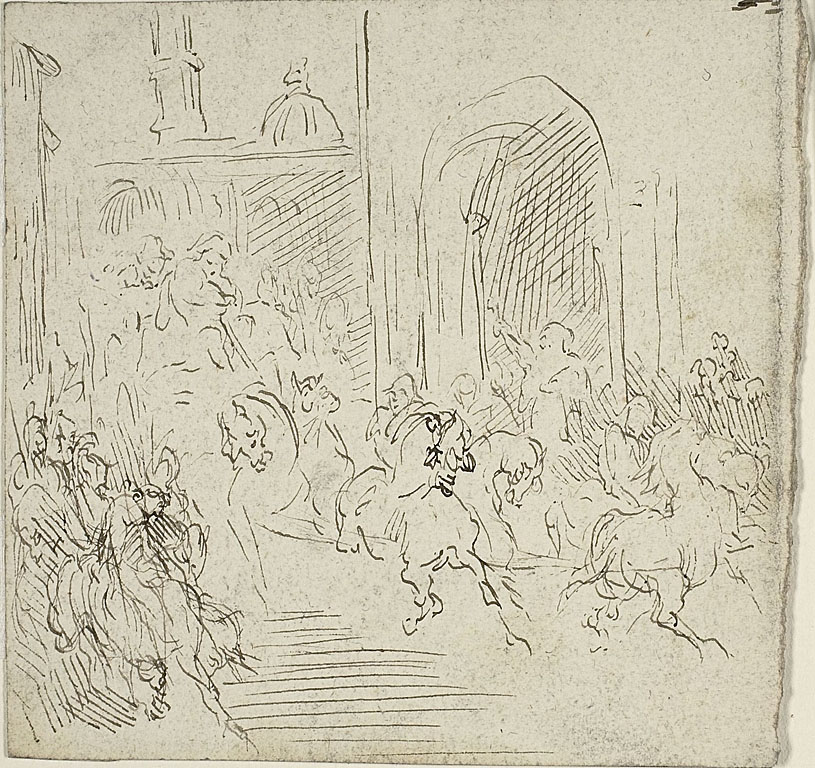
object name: Drawing and Watercolor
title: Equestrian Scene in a City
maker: Jean Baptiste Carpeaux (French, 1827-1875)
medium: Pen and brown ink, over traces of graphite, on ivory wove paper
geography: France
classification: pen and ink drawings; drawings (visual works); prints and drawing